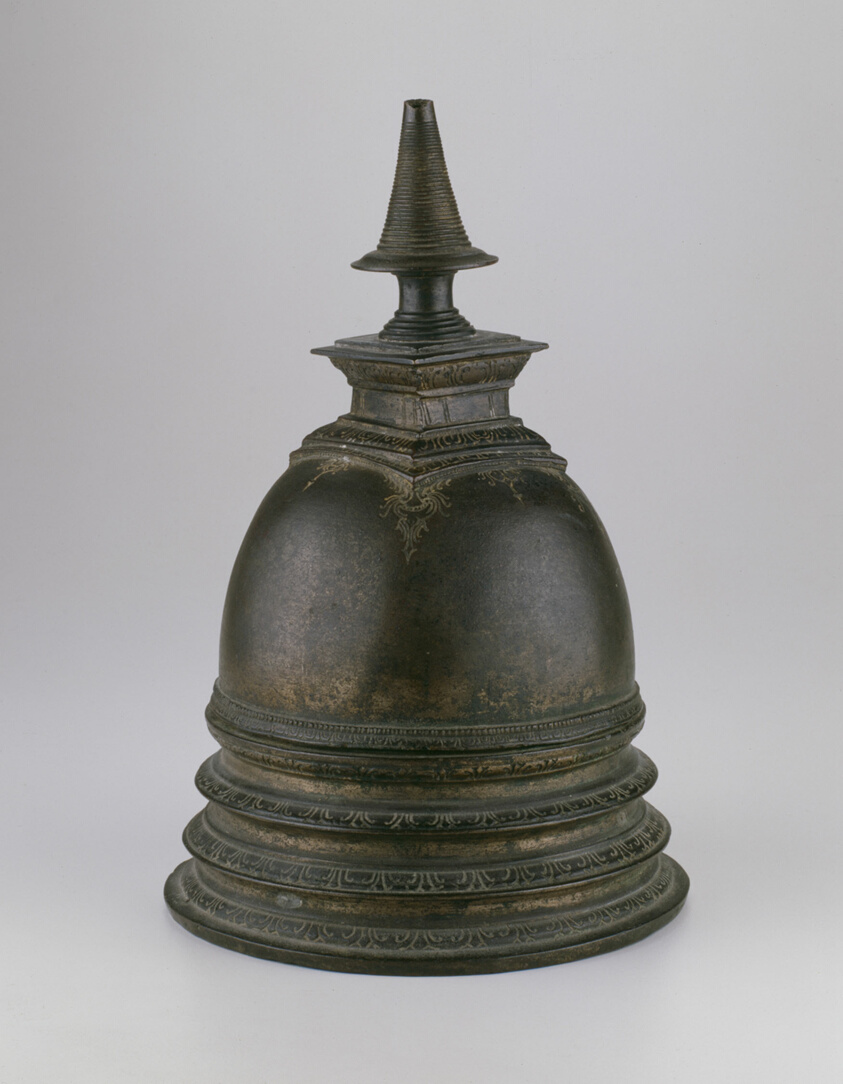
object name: Sculpture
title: Stupa Reliquary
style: South Asian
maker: Sri Lanka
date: About 14th/15th century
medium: Bronze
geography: Sri Lanka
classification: reliquary; container; bronze; metal; asian art; sculpture